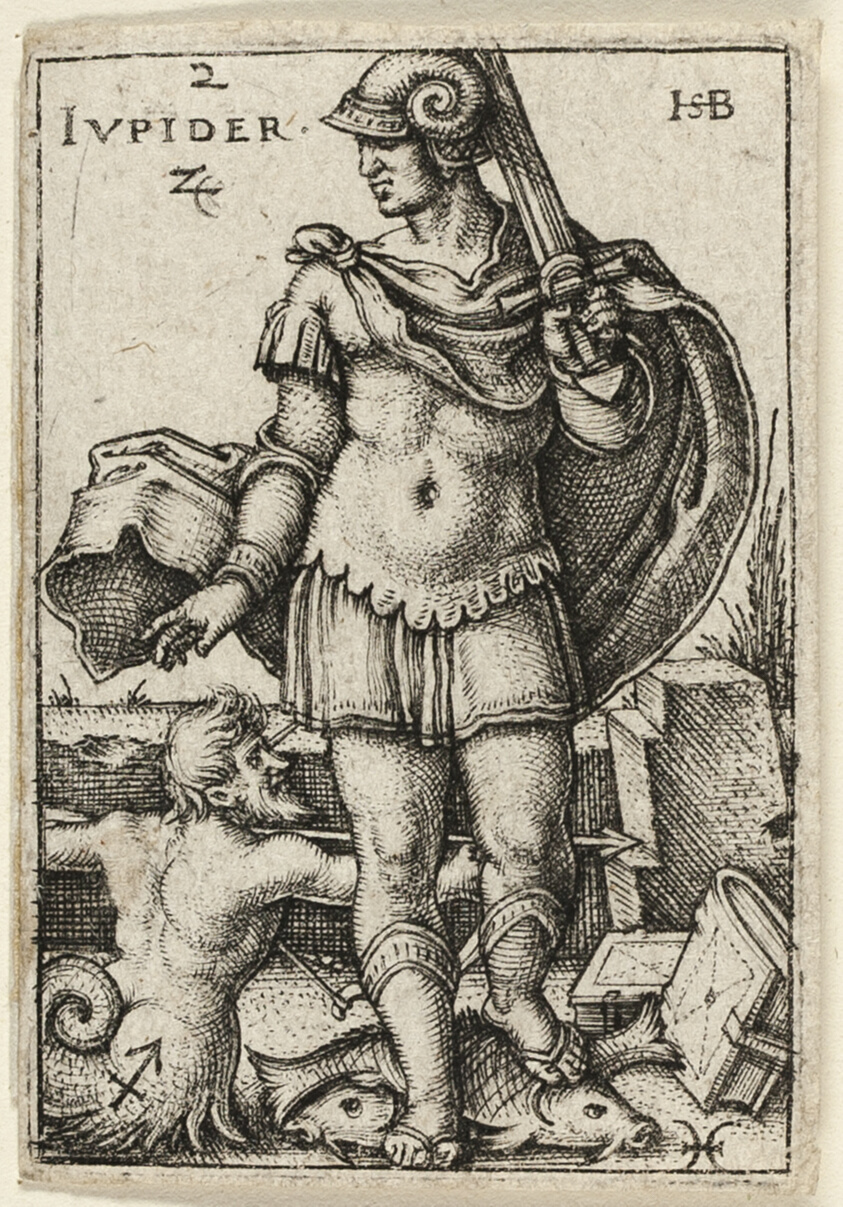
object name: Print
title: Jupiter, plate two from The Seven Planets with the Zodiacs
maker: Sebald Beham; German, 1500-1550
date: 1539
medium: Engraving in black on ivory laid paper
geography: Germany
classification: engraving; prints and drawing; print